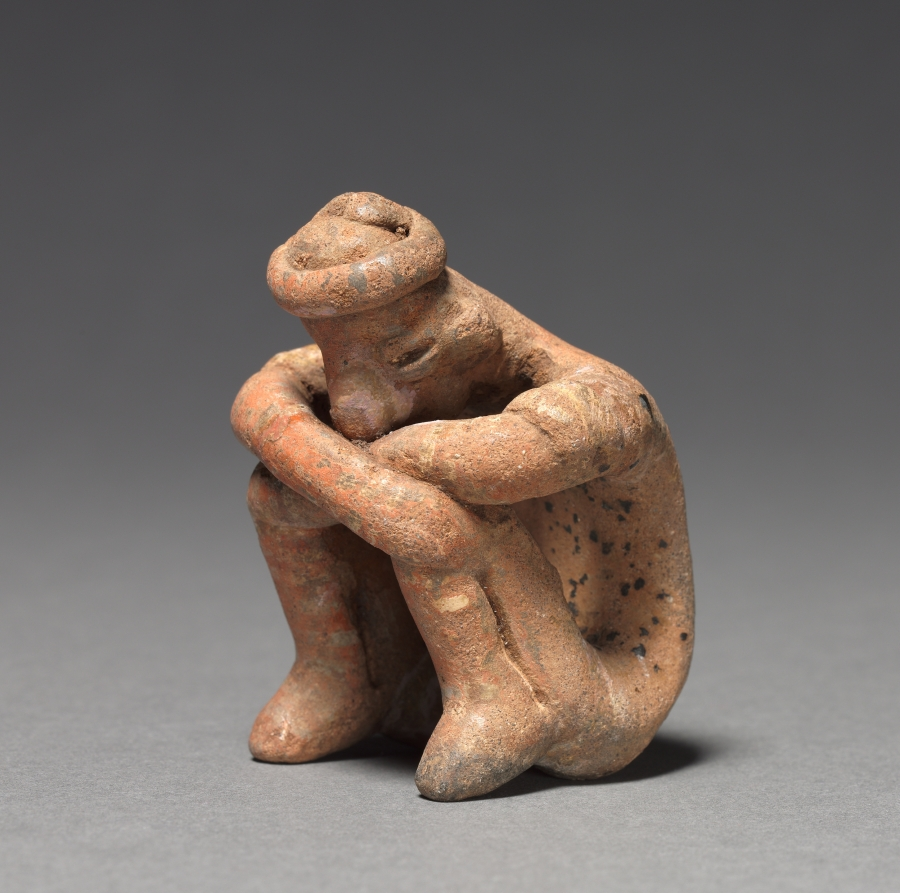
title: Seated Male Figurine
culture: Mesoamerica, Veracruz, Remojadas Style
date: 500–900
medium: ceramic, pigment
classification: Sculpture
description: Clay figurines were the earliest and most common art form in Mexico and other countries in the ancient Mesoamerican (Middle American) culture region. Made first by hand and later with molds, most figurines belong to the traditions of commoners, such as farmers, rather than those of elites.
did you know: Clay figurines were the earliest, most common art form in the ancient Mesoamerican culture region.